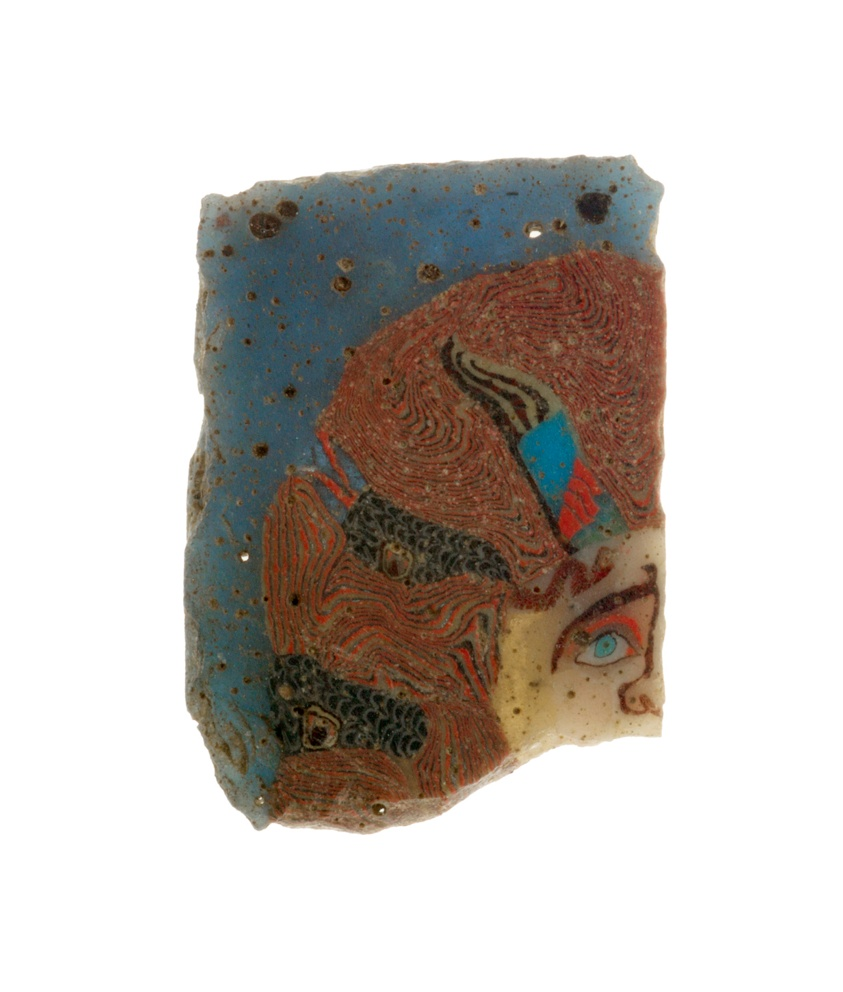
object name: Decorative Arts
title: Fragment of an Inlay Depicting a Theater Mask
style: egyptian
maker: Egyptian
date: Late 1st century BCE-early 1st century CE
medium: Glass, mosaic glass technique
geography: Italy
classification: glass; inlay; ancient art; decorative arts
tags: masks, theater